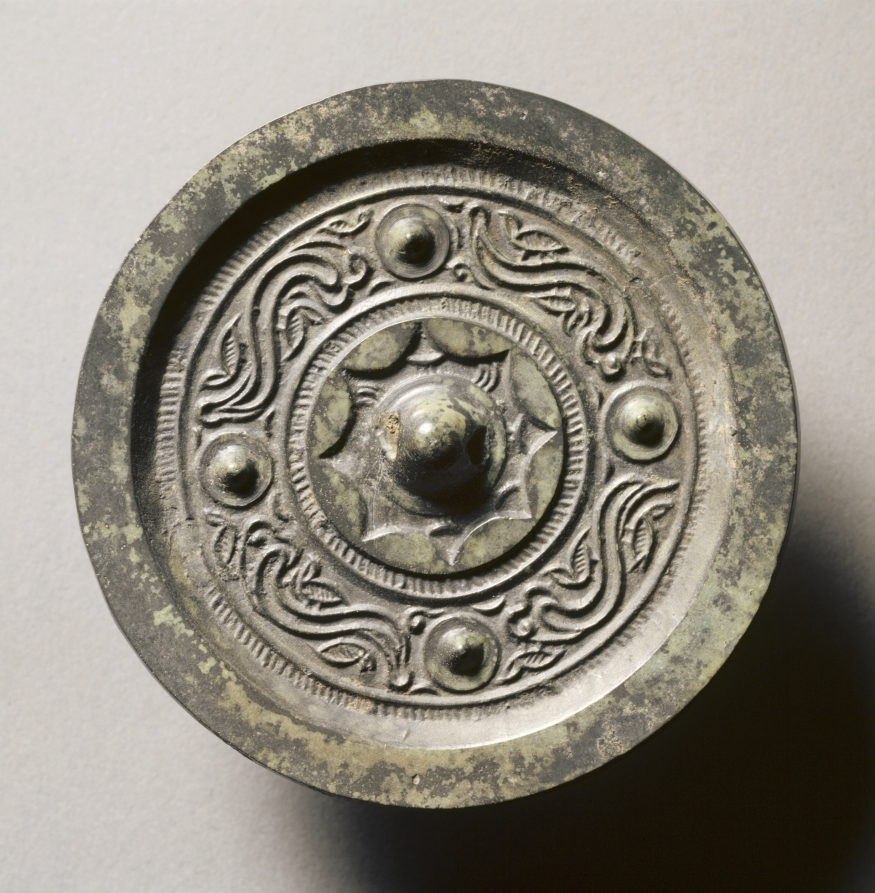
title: Mirror with Four Nipples, Quasi-Dragons, and Birds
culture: China, Western Han dynasty (206 BCE–8 CE)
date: late 300s BCE–50 CE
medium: bronze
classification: Metalwork